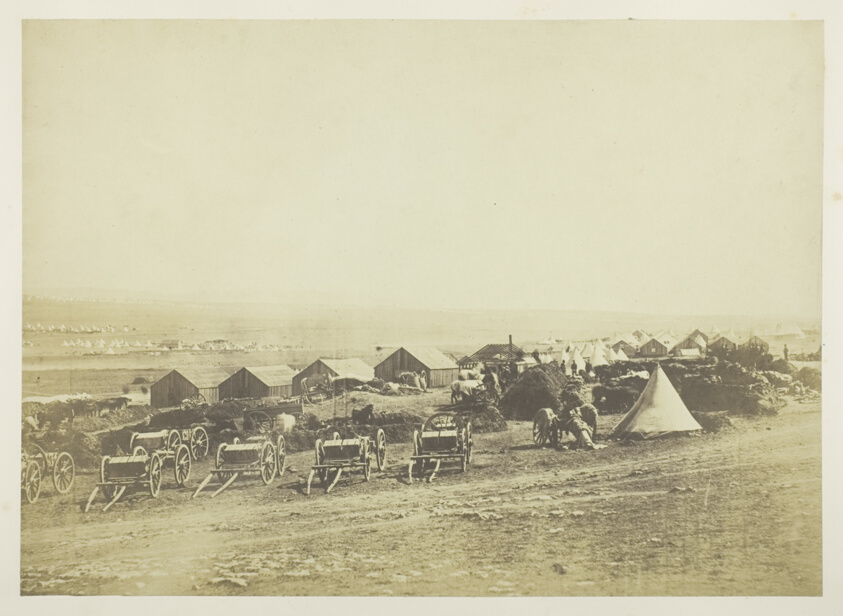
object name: Photograph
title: Artillery Waggons, Balaklava in the Distance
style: 19th century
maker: Roger Fenton (English, 1819-1869)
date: 1855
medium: Salted paper print, plate 4 from the album "Photographs Taken in the Crimea" (1856)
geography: England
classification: salted paper print; photographic process; photography; photograph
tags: Collected by Hugh Edwards, Crimea 1856